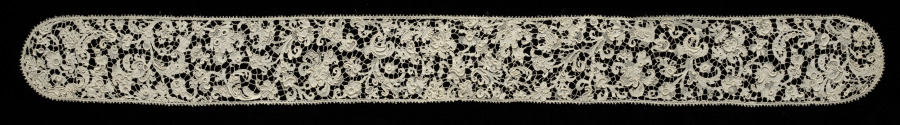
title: Lace Lappet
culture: Italy, Venice, 1700s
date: 1700s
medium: Linen: needle lace (Venetian Raised Point)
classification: Lace